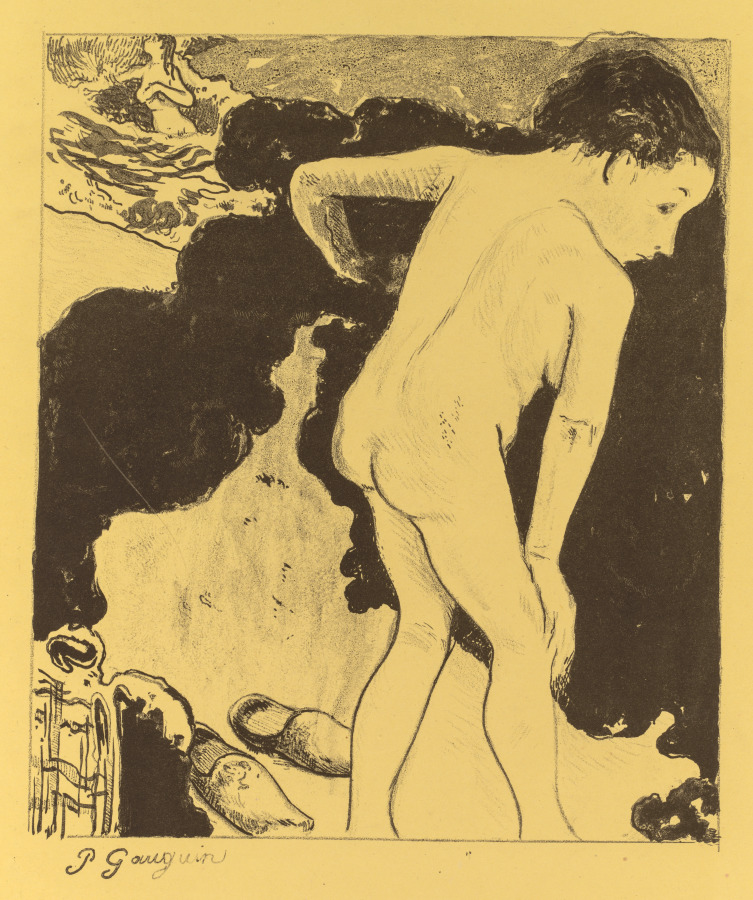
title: Volpini Suite: Breton Bathers (Baigneuses Bretonnes)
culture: France, 19th century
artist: Paul Gauguin (French, 1848–1903)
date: 1889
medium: zincograph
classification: Print